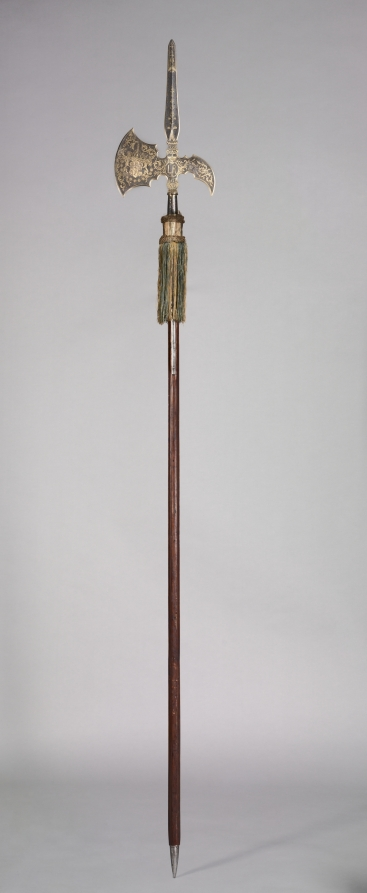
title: Parade Halberd (from the bodyguard of Ludwig Rudolf, Duke of Brunswick- Wolfenbüttel [1671-1735])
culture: Germany, 18th century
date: 1717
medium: blued, etched and gilded steel, wooden haft with orginal steel base spike, silk tassel with alternating blue and gold bands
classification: Arms and Armor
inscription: 'LR'; 1717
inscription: Coat of Arms Brunswick-Wofenbüttel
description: The halberd and partisan are hafted weapons highly favored by European infantries of the 1500s and 1600s for their great versatility and deadly effect. From about 1550 on, these weapons underwent significant changes as they gradually became more ornamental. The large flat surfaces of the blades lent themselves to engraving, etching, gilding, and other forms of decoration. They also provided the perfect location for the coats of arms of princely or noble families. For this reason, hafted weapons became the favored parade weapons of palace guards and splendidly outfitted special regiments of princely bodyguards. These examples, made for the German dukes of Brunswick at Schloss Blankenburg, still have their silk tassels in their original colors of blue and yellow.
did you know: A halberd is a mix between a battle ax and a spear.